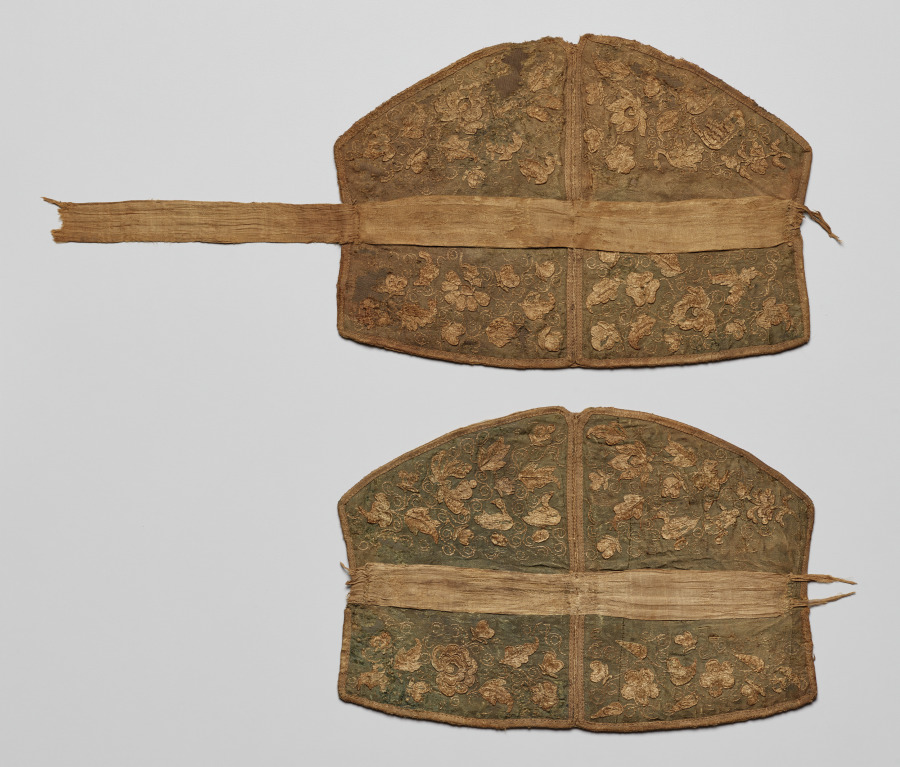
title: Pair of Headpieces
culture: China, Liao dynasty (907-1125)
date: 907–1125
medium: embroidery, silk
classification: Embroidery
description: These headpieces are embroidered with butterflies, birds, animals, flowers, leaves, and delicate vine scrolls. In general, the design is related to the theme of the lotus pond, best known from Liao tomb paintings. Paired ducks or geese swimming in water and looking in opposite directions seem to have become popular in the north of China before spreading further south and to Central Asia. On the other hand, recumbent animals looking back are a Central Asian image that migrated to northern China. Headpieces of this shape, intersected by two bands and secured by ties, have a long history in northern China. A gold replica was found in a tomb dating as early as 500–550.